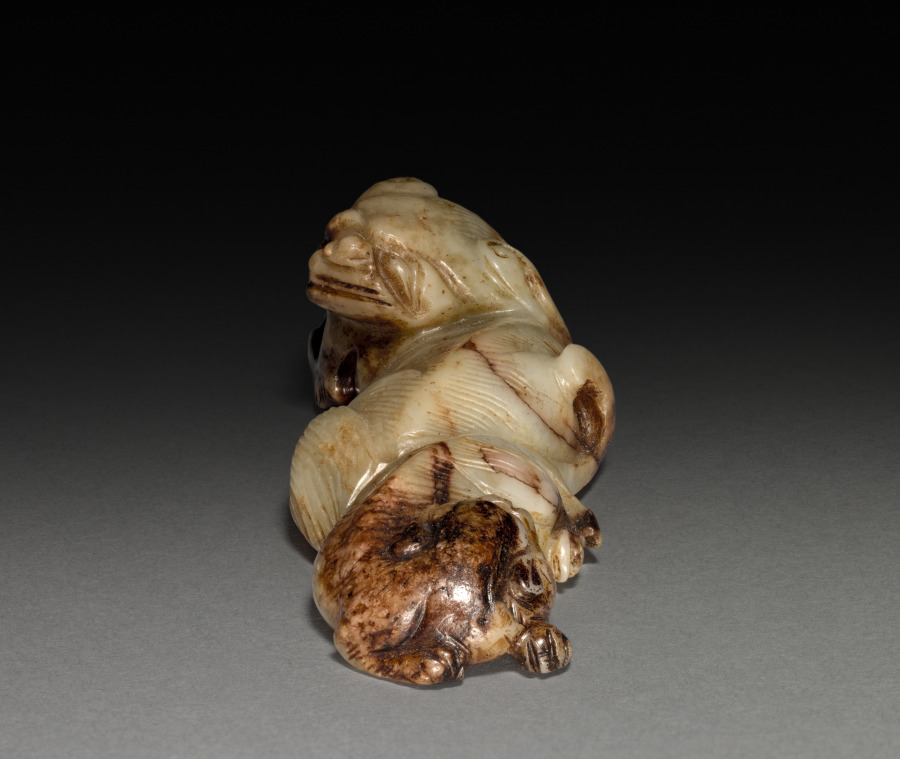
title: Reclining Dog and Puppy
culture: China, Yuan dynasty (1271-1368)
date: 1271–1368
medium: jade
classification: Jade